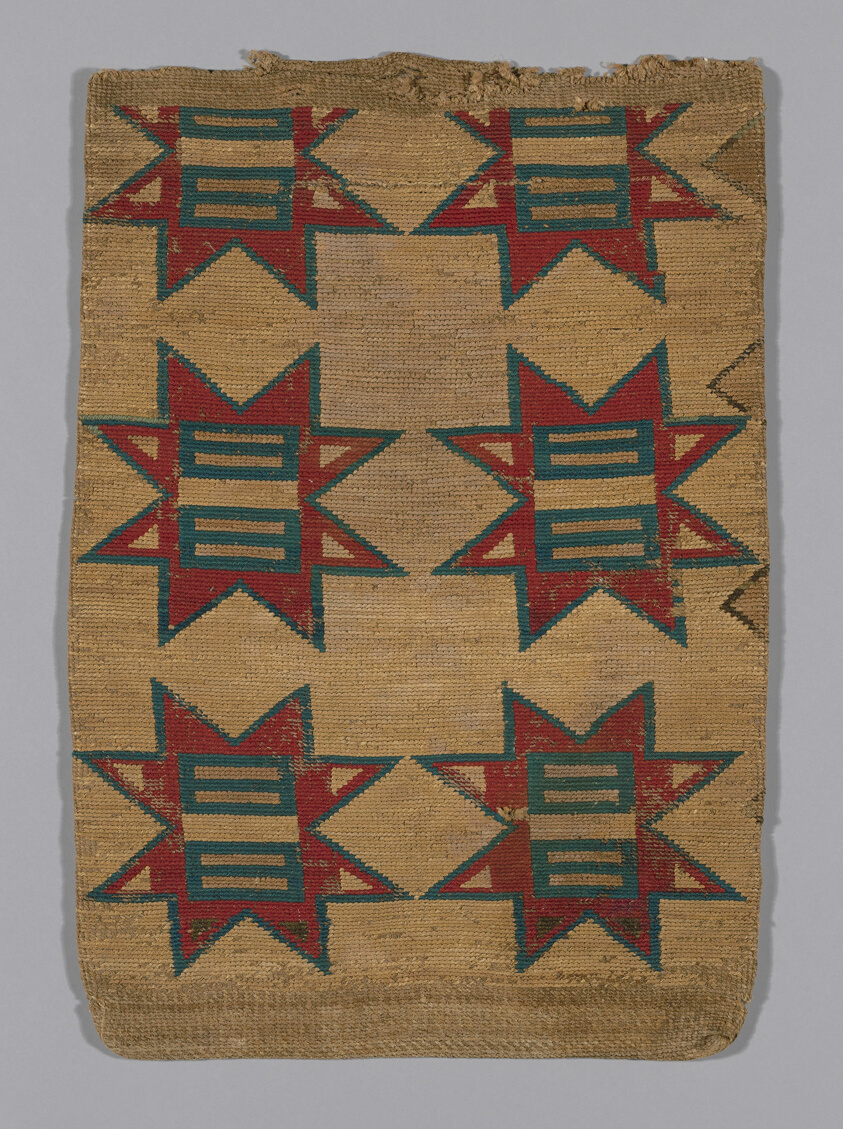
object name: Textile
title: ˀımáˀsp̉alx̣ (Flat Storage Bag)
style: native american, nez percé, nimiipuu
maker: Probably Nez Perce (Nimíipuu); Columbia Plateau, United States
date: c. 1850/70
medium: Bast fiber, 2 strand weft-twining; with wool and cornhusk, supplementary weft-twining (false-embroidery)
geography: Columbia Plateau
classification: textile; bag - weaving; needlework (visual works)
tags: geometric